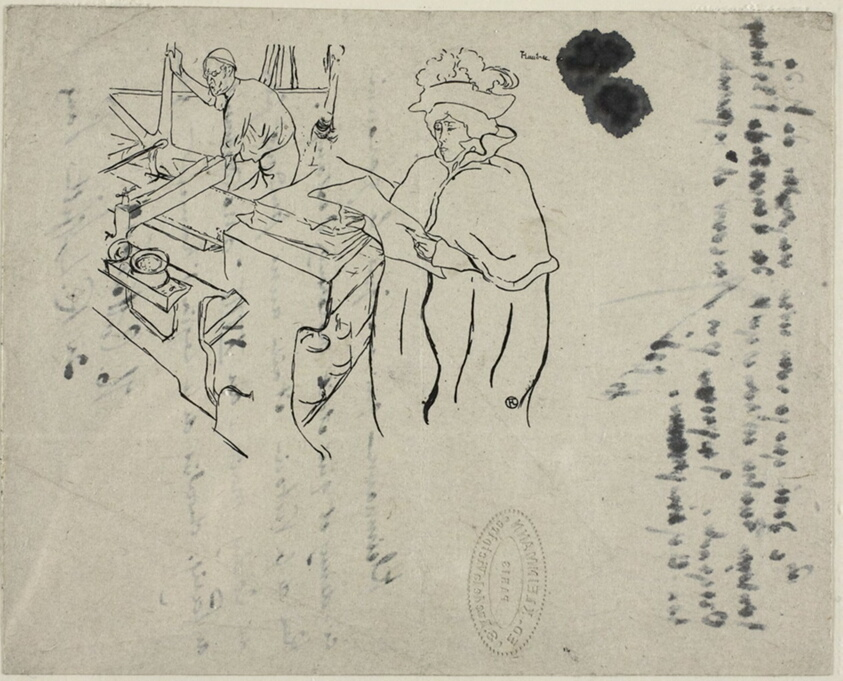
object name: Print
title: Cover of L'Estampe originale, with notes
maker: Henri de Toulouse-Lautrec (French, 1864-1901)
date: 1893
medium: Lithograph in black on grayish-ivory wove China paper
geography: France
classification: lithograph; print; prints and drawing